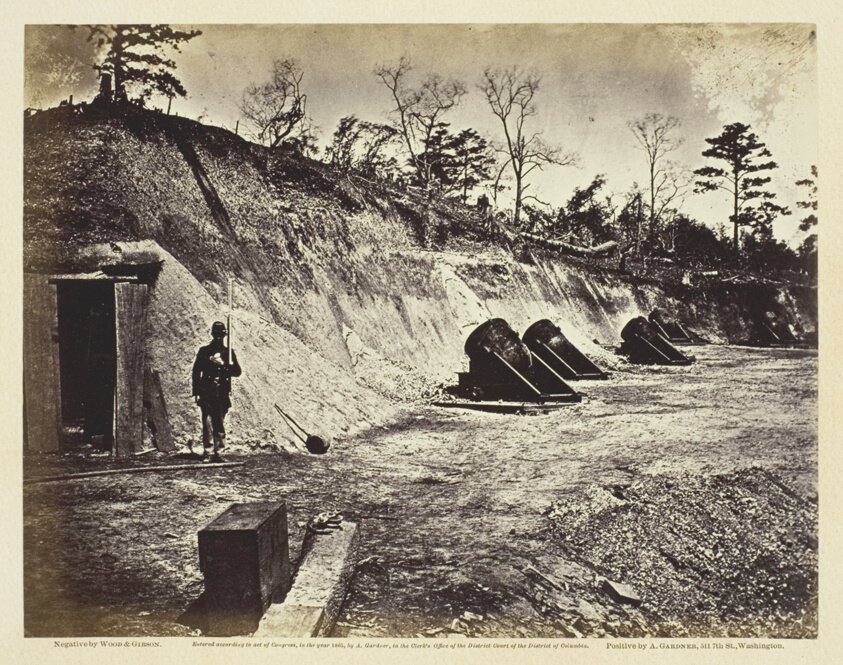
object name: Photograph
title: Battery No. 4, Near Yorktown, Virginia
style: 19th century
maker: Wood and Gibson (American, active 19th century)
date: May 1862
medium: Albumen print, pl. 14 from the album "Gardner's Photographic Sketch Book of the War, vol. 1" (1866)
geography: United States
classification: albumen silver print; photographic process; photography; photograph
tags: Collected by Hugh Edwards, Gardner's Photographic Sketch Book